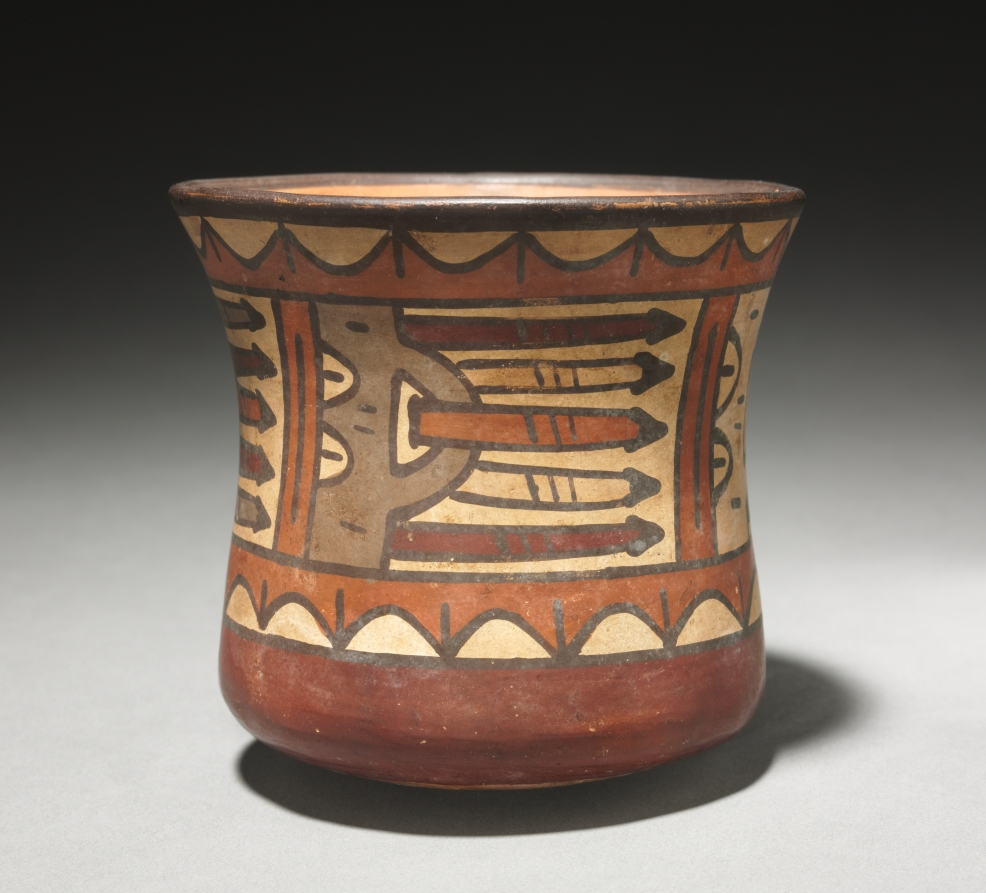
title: Bowl with Trophy Heads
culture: Peru, Nasca, Early Intermediate Period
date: c. 100–650 CE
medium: ceramic, slip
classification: Ceramic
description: Nasca is one of the two major cultures and ceramic styles of its periods, and one of the finest ceramic styles ever produced in the South American Andes. Vessel walls are thin, firing temperatures higher than in earlier times, and a variety of warm, earthen-toned slips come into use. This small bowl features repetitions of human trophy heads—a major Nasca motif that refers both to war and fertility.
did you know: Two important themes in Nasca art are war and fertility.